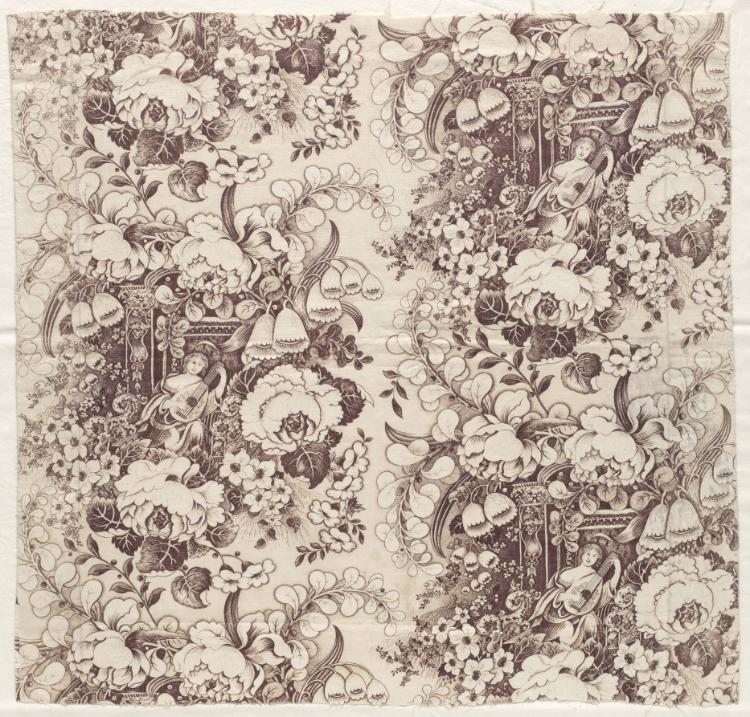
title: Roller-Printed Cotton with Design of Woman Playing a Lute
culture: England, early 19th century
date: early 1800s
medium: roller printed cotton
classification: Textile